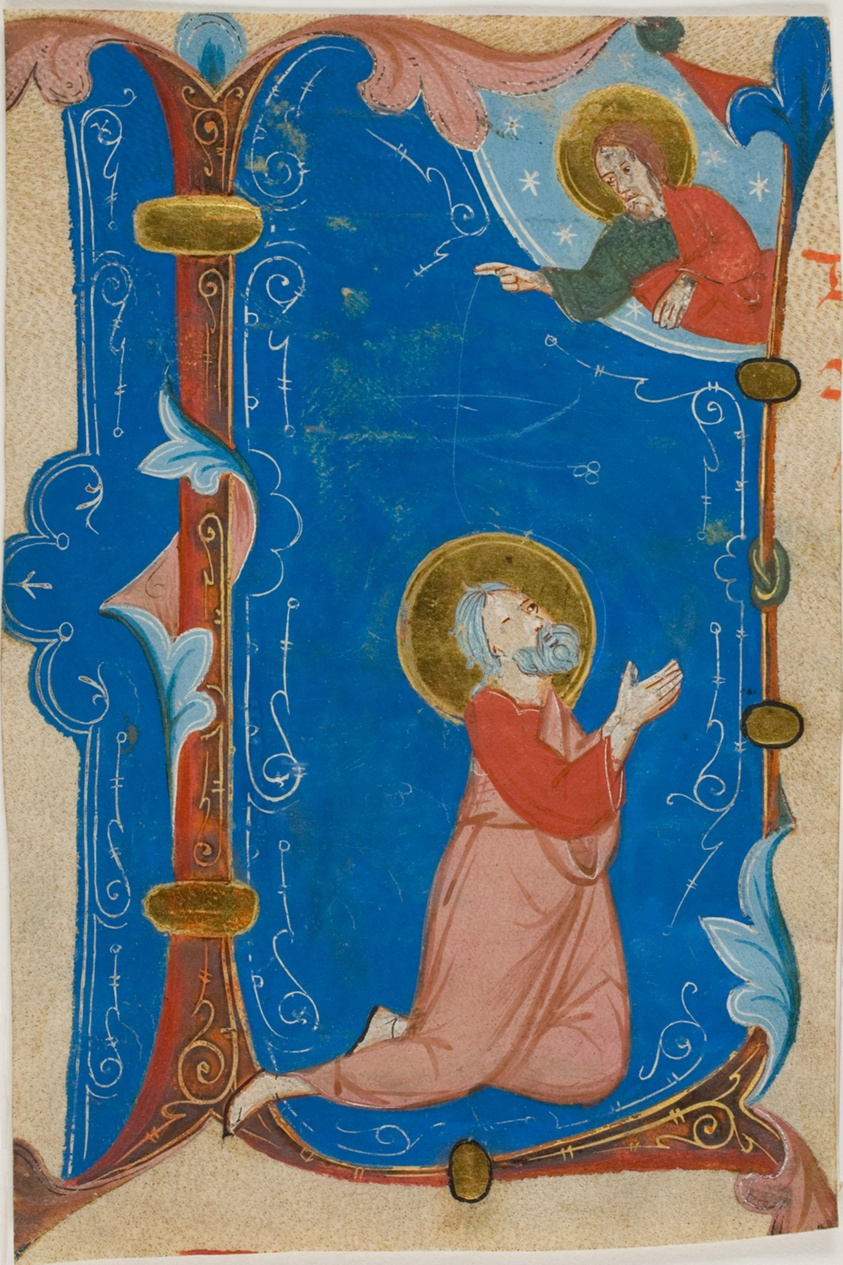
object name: Drawing and Watercolor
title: Praying Saint (Moses?) with Christ in a Historiated Initial "L", from a Choirbook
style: medieval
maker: Italian (probably Rimini); related to the style of Neri da Rimini (Italian, active 1300-1322)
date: c. 1300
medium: Manuscript cutting in tempera and gold leaf, with gothica textura inscriptions in light black ink, verso, ruled in red, on parchment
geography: Italy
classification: tempera; manuscript; drawings (visual works); prints and drawing